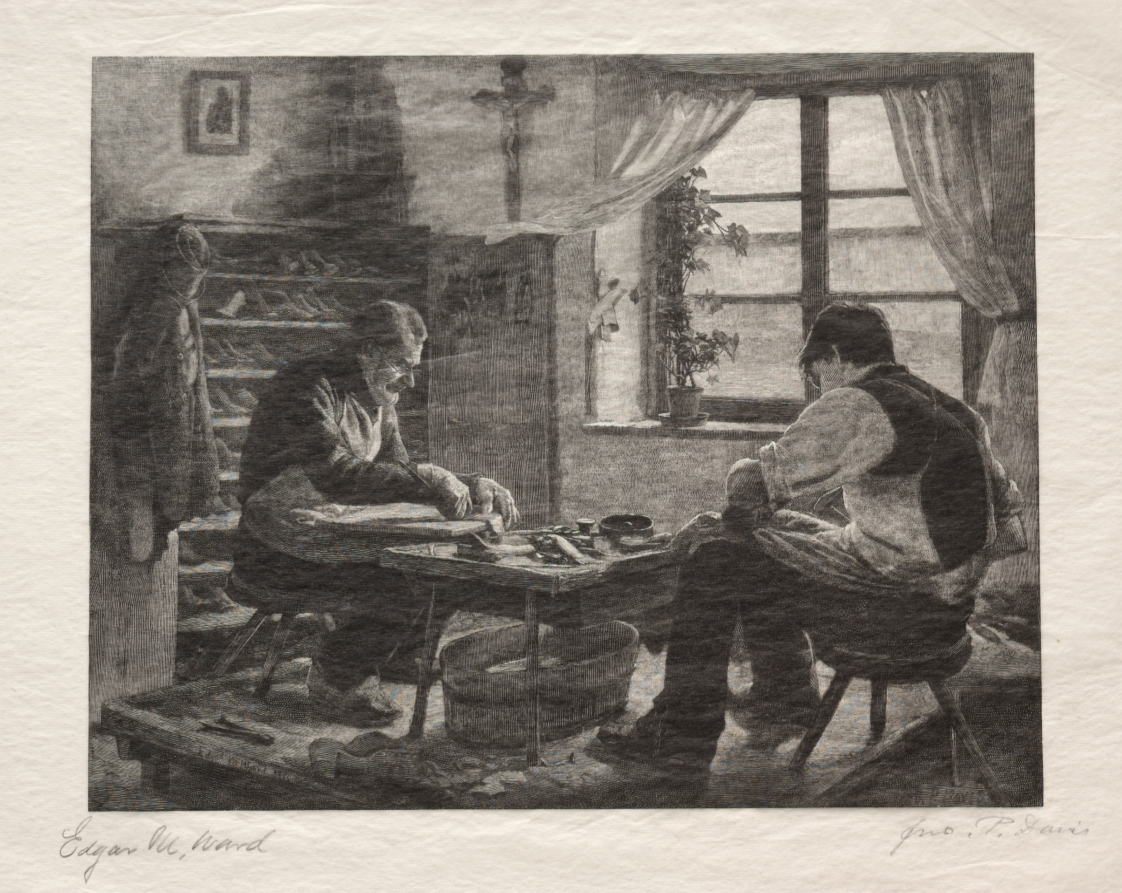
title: The Cobblers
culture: America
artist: John Parker Davis (American, 1832–1910)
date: 1887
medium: wood engraving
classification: Print